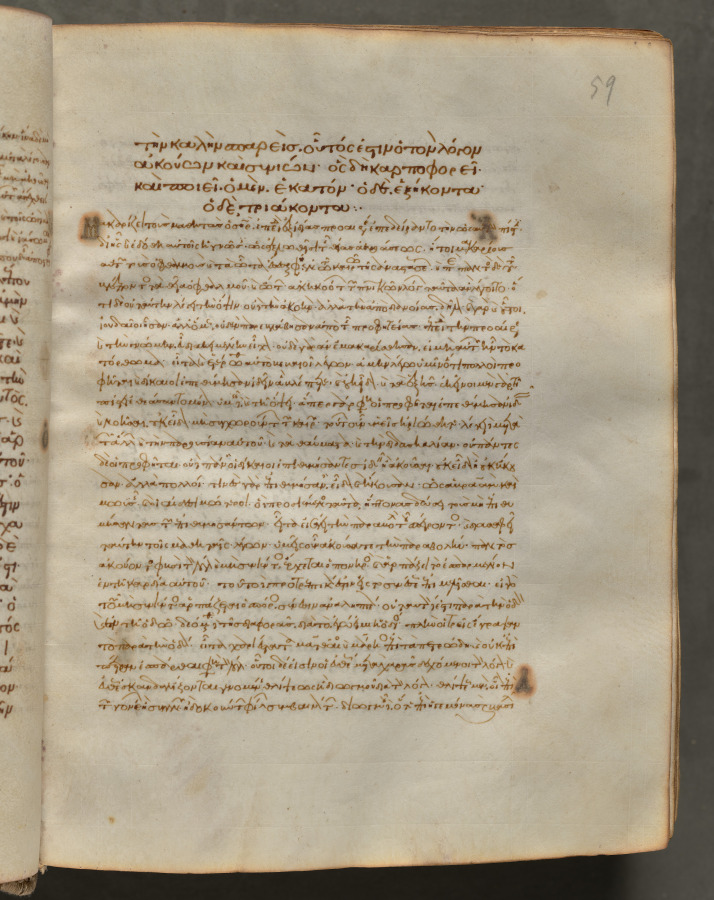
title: Text, folio 59 (recto), from a Gospel Book with Commentaries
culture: Byzantium, Constantinople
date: c. 1000–1100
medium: ink, tempera, and gold on vellum; leather binding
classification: Bound Volume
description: Each of the four gospels in this book opens on a page with brilliantly illuminated borders depicting the author of the text as well as birds-principally peacocks, symbols of the immortality of the soul-and fountains, representing the fountain of life and the salvation of the soul. This volume consists of 428 leaves with texts in Greek. Its level of sophistication suggests that it was probably written and decorated in a monastery in Constantinople.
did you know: Gospel Books were carried in procession through Byzantine churches.